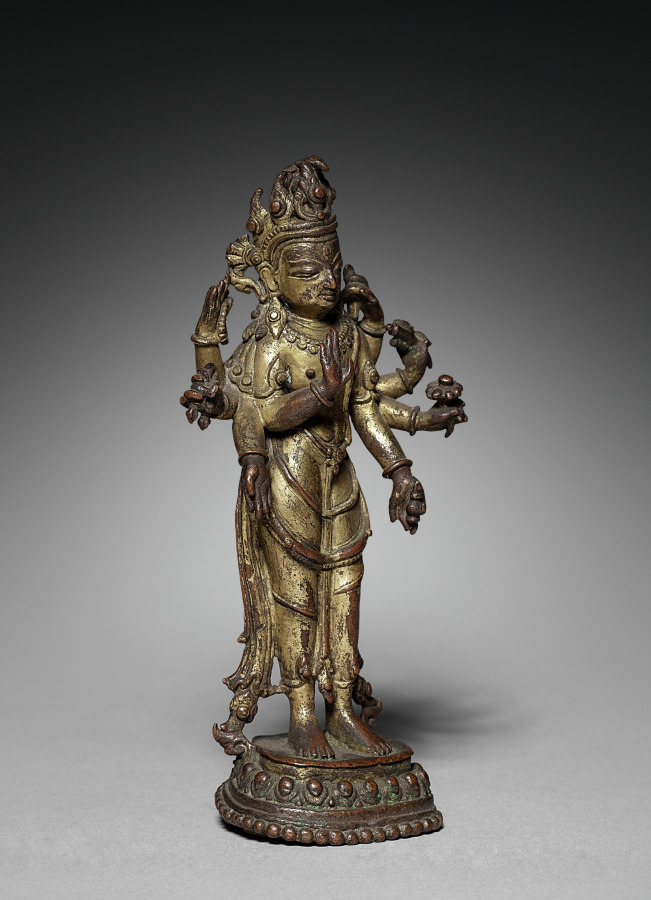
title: Lokesvara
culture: Nepal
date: 1600s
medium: gilded copper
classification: Sculpture